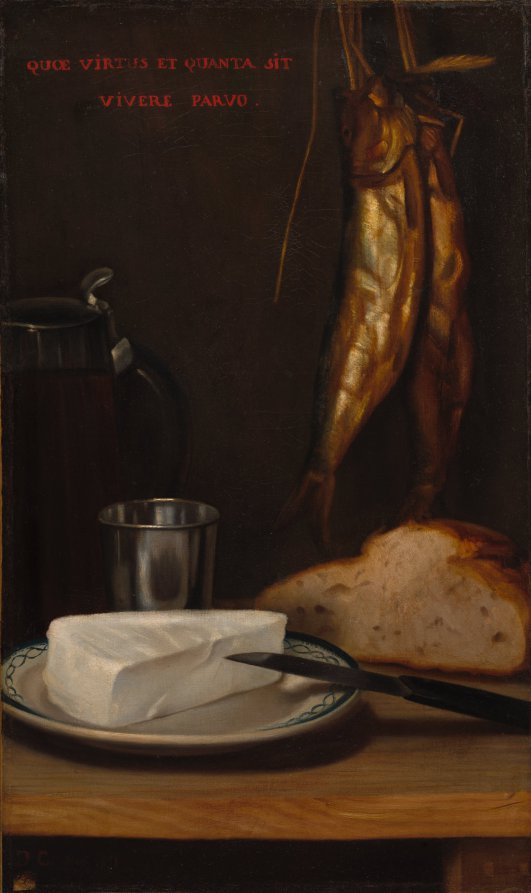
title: Still Life with Herring, Bread, and Cheese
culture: France, 19th century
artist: Alexandre-Gabriel Decamps (French, 1803–1860)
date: 1858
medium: oil on canvas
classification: Painting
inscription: Signed lower left: dc Rev 1858; inscribed: quoe [sic] virtus et quanta sit / vivere parvo [How virtuous, and how great to live with simple things]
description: This painting forms a pair with the Still Life with Pipe and Matches. Along with several other paintings, they decorated the dining room of the artist's home, each painting representing a different stage of a meal. In this composition the artist focused his attention on rendering textures, which are as varied as the objects themselves: the skin of the smoked herrings, whose highlights echo the silver of the goblet and the cover of the pitcher; the spongy surface of the bread; the velvety crust of the cheese; and finally the soft wood surface (pine?) that supports this still life. The Latin inscription translates: "How virtuous and how great to live with simple things."